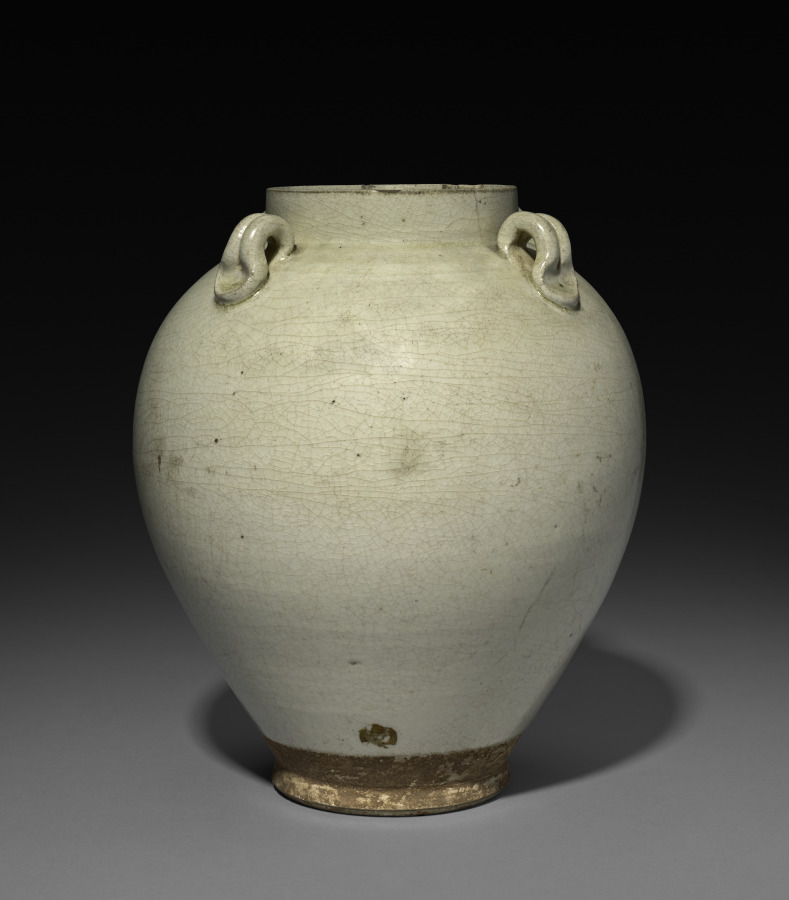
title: Jar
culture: China, Tang dynasty (618-907)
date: mid-600s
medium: glazed stoneware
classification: Ceramic